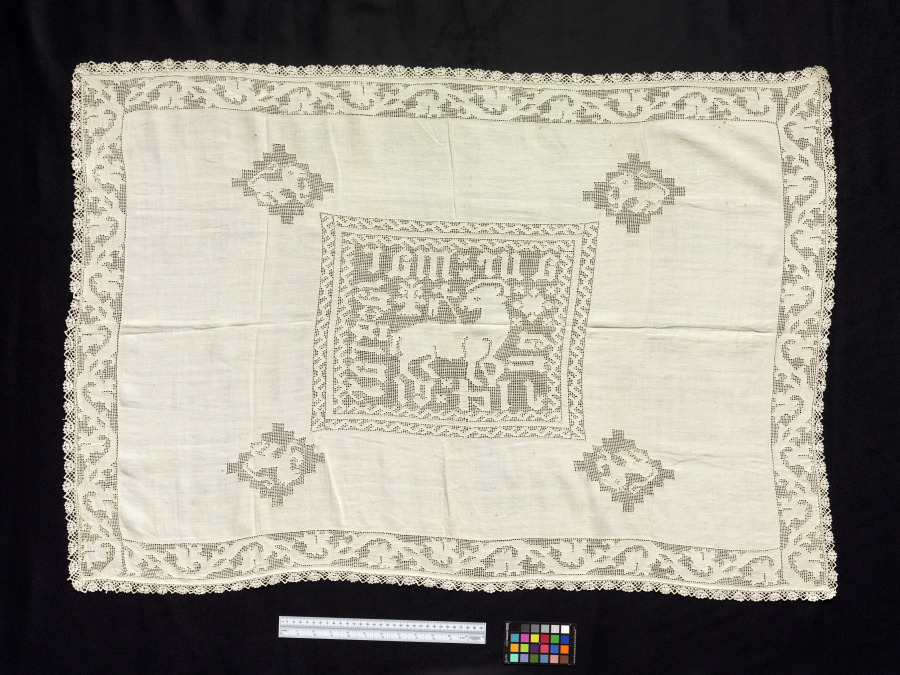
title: Lace Cloth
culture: Italy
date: 1500s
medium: Linen: needle lace (drawnwork) and bobbin lace edging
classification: Lace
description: The central needle lace (drawnwork) medallion features agnus dei (lamb of God).